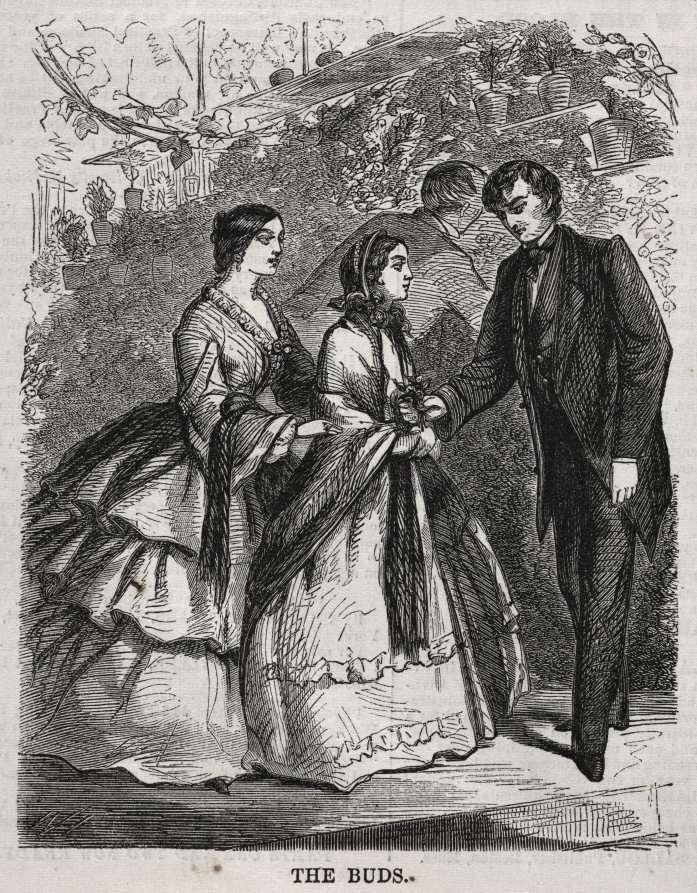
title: The Buds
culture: America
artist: Winslow Homer (American, 1836–1910)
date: 1860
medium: wood engraving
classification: Print